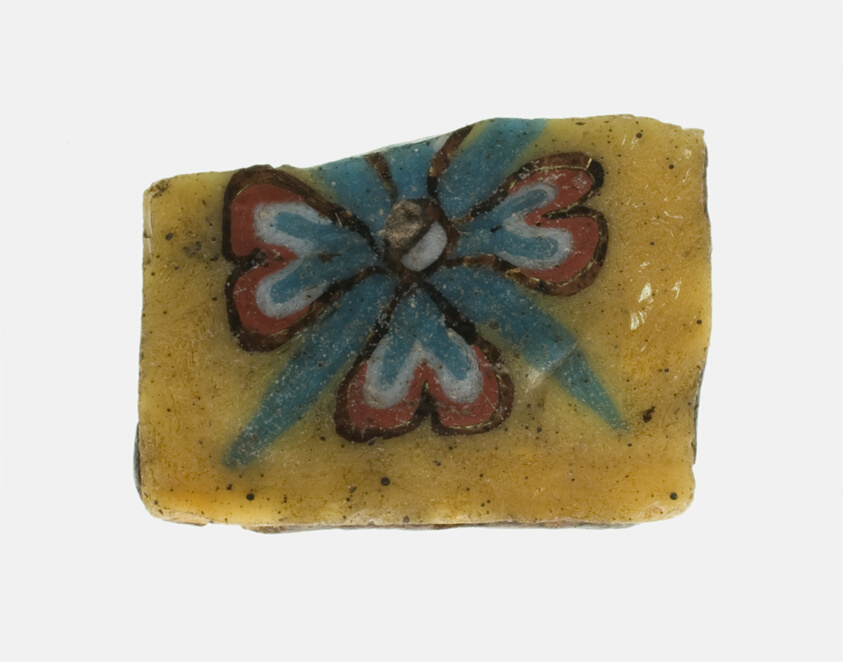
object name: Decorative Arts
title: Fragment of a Floral Inlay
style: egyptian, ancient, roman (ancient, style or period)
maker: Egyptian or Roman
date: Ptolemaic Period–Roman Period, (1st century BCE–1st century CE)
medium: Glass, mosaic technique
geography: Italy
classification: glass; inlay; ancient art; decorative arts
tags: floral